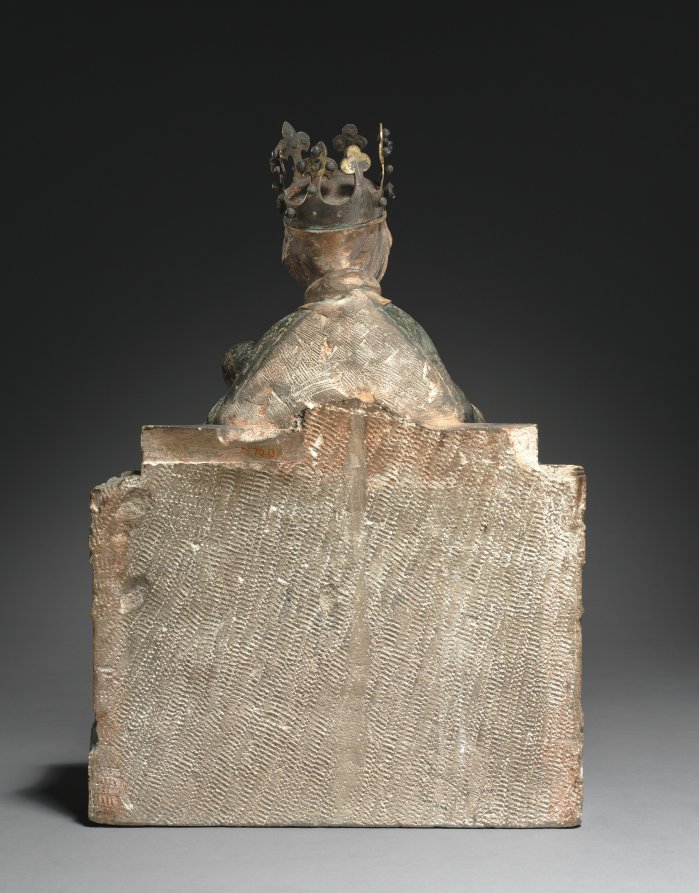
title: Enthroned Virgin with the Writing Christ Child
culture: Franco-Netherlandish, active Paris(?), 15th century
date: c. 1400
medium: limestone with polychromy and gilding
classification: Sculpture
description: This sculpture belongs to a tradition of seated Virgins that were prominent in Netherlandish art in the decades around 1400, and by extension may be associated with the Valois courts at Paris, Dijon, and Bourges. The theme of the Christ child who writes into an open book or onto a vellum banderole emerged during the third quarter of the 14th century and had great appeal among ecclesiastical and aristocratic clients. It undoubtedly refers to the educating and nurturing role of the mother in teaching the child, but also to the future position of the adult Christ as author and teacher. The small scale of this sculpture and the fact that its back is uncarved suggest that it was made for a small alcove or niche, appropriate in the intimate setting of a small chapel or oratory. The sculpture would have primarily been viewed from the front and perhaps from slightly below.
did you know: Here the Virgin is sitting on a highly decorated pillow.